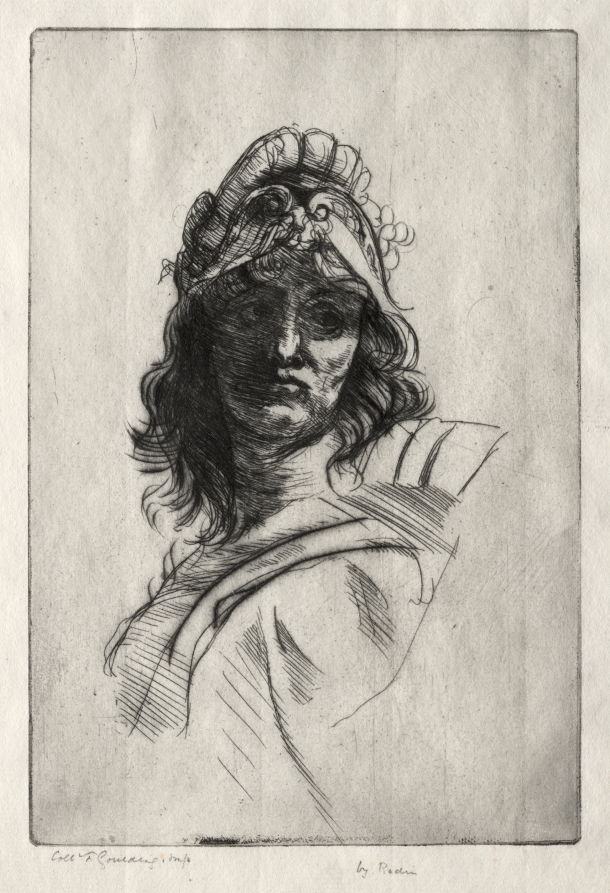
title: Bust of Bellone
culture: France, 19th century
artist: Auguste Rodin (French, 1840–1917)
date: 1883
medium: drypoint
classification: Print